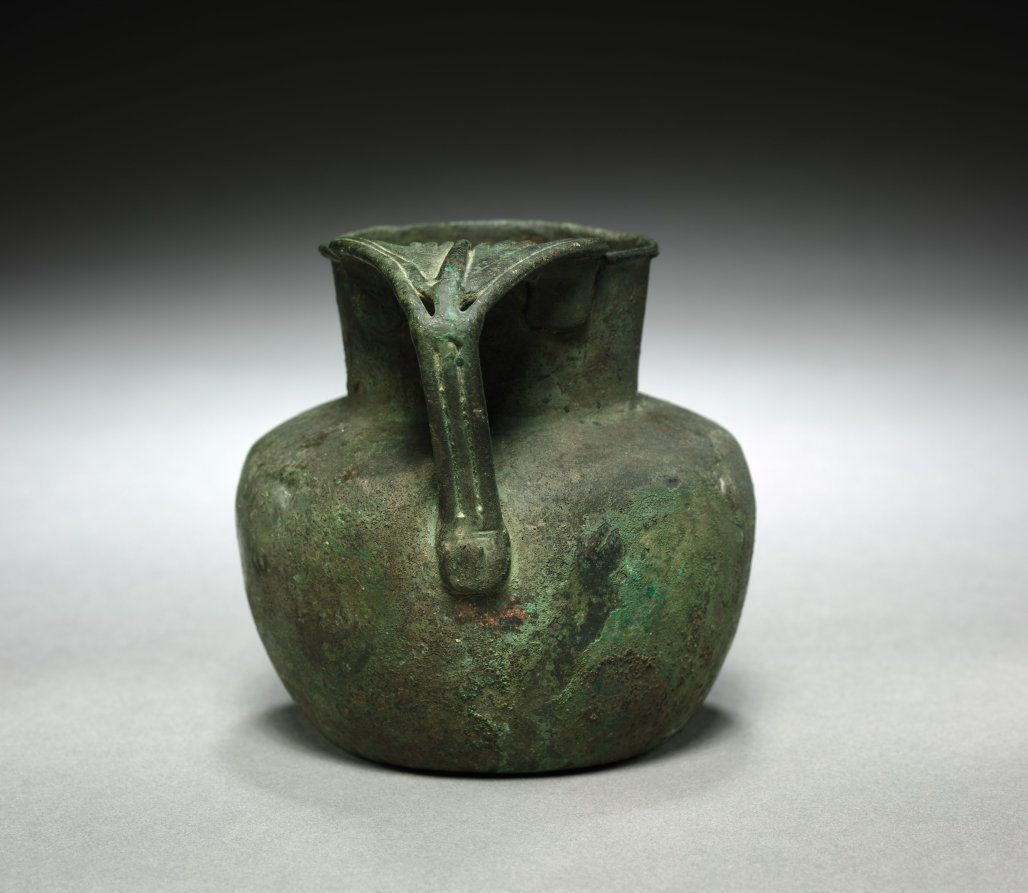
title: Jug or Pitcher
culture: Egypt, New Kingdom (1540–1069 BCE), Dynasties 18–19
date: 1350–1186 BCE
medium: bronze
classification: Vessels